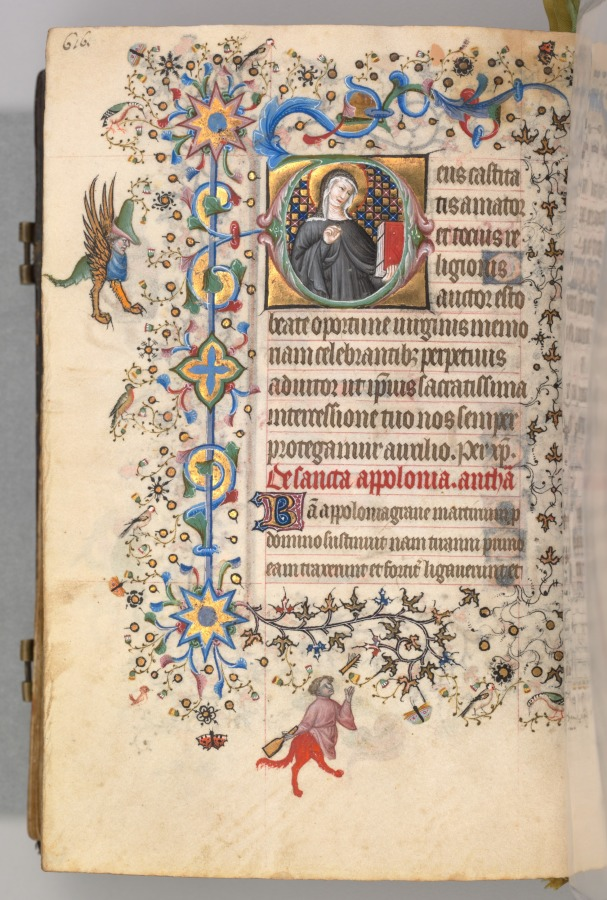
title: Hours of Charles the Noble, King of Navarre (1361-1425): fol. 302v, St. Opportune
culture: France, Paris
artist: Master of the Brussels Initials and Associates (French)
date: c. 1405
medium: ink, tempera, and gold on vellum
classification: Bound Volume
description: This precious volume was obviously highly prized by its owner, the French-born King of Navarre, who had his coat of arms painted on no less than twenty folios. Rather than directly commissioning this manuscript from a specific workshop, it seems that Charles the Noble acquired his book of hours -- perhaps ready-made for the luxury market -- while on a trip to Paris in 1404-05. A collaborative effort, six painting styles are evidenced within the pages of this codex, those of two Italians, two Frenchmen, and two Netherlanders. The painter who was responsible for the planning and decoration of the book, and who produced seventeen of the large miniatures, was a Bolognese artist known as the Master of the Brussels Initials. His principal assistant, responsible for most of the borders, was a Florentine who signed his name "Zecho" da Firenze on folio 208 verso.